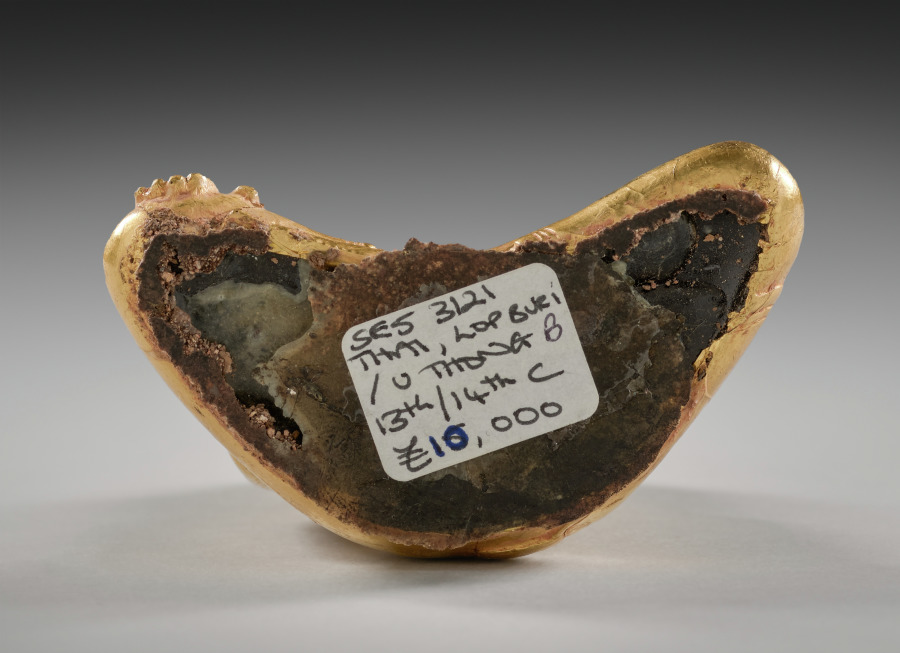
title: Seated Buddha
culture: Thailand, Ayutthaya, Wat Ratchaburana, 14th century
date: before 1424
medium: gold with resin core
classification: Sculpture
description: This pristinely modeled Buddha was fashioned from a sheet of 24-karat gold, using the repoussé (hammering) technique. The figure is filled inside with a resin core. The style is typical of the last phase of Khmer art (800s–1400s), the Lapburi style, which combines characteristics of both Cambodian and Thai sculptural styles.